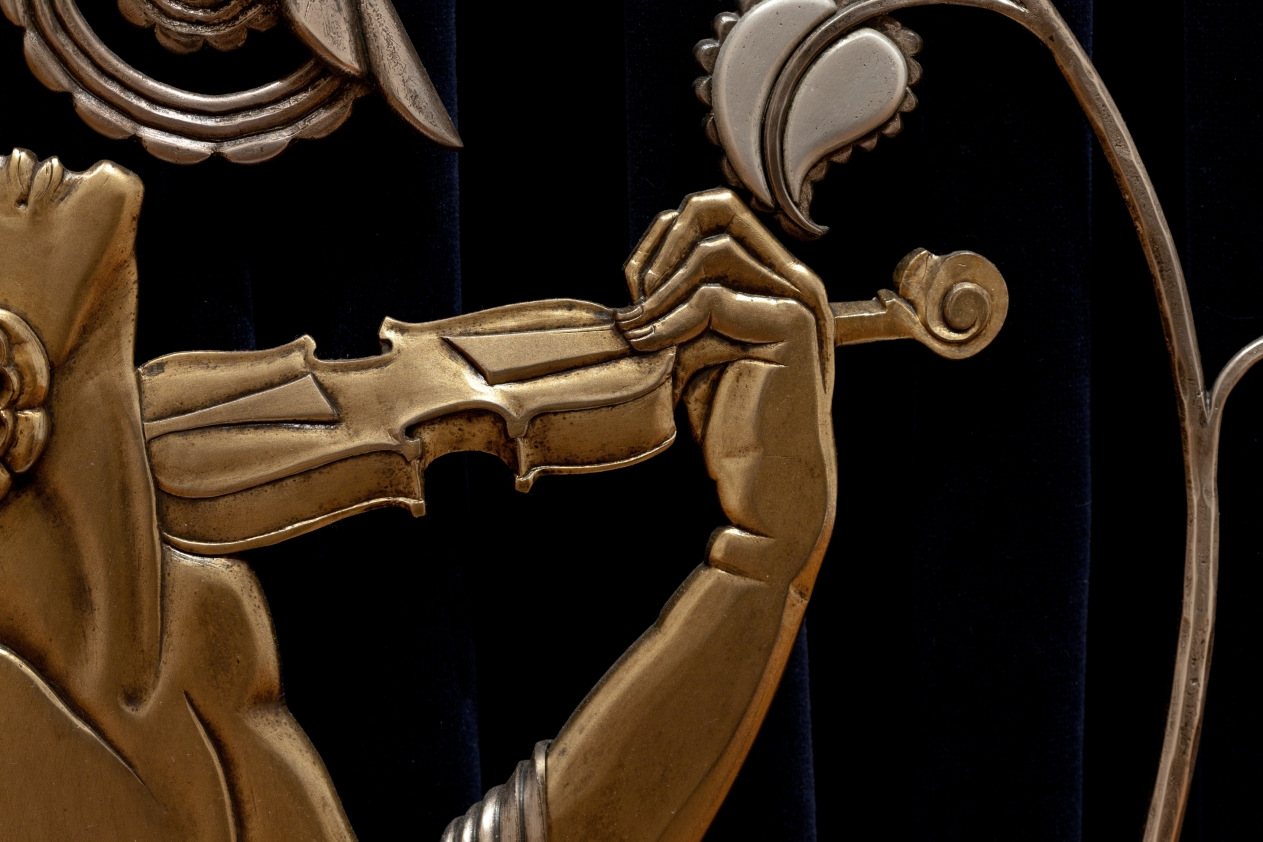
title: Muse with Violin Screen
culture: America, Ohio, Cleveland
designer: Paul Fehér (American, born Hungary, 1898–1990)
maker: Rose Iron Works (America, Ohio, Cleveland, est. 1904)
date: 1930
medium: Steel, brass; silver and gold plating, cotton velveteen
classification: Metalwork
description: Since the early years of the 20th century, the Rose Iron Works, a Cleveland supplier of architectural ornament, has produced distinguished metalwork. The company’s founder, Martin Rose, was born in Austria-Hungary and studied ornamental metalsmithing in Vienna prior to immigrating to Cleveland in 1902. In the 1920s, he hired a talented young Parisian designer, Paul Fehér, to work for the firm. Fehér’s designs, culminating in this massive screen, brought a modern European sensibility to the Rose Iron Works production. With its geometric patterning, highly stylized and abstracted natural forms, and the central figure reminiscent of the celebrated jazz singer Josephine Baker, this screen reflects the classic motifs of Art Deco design.